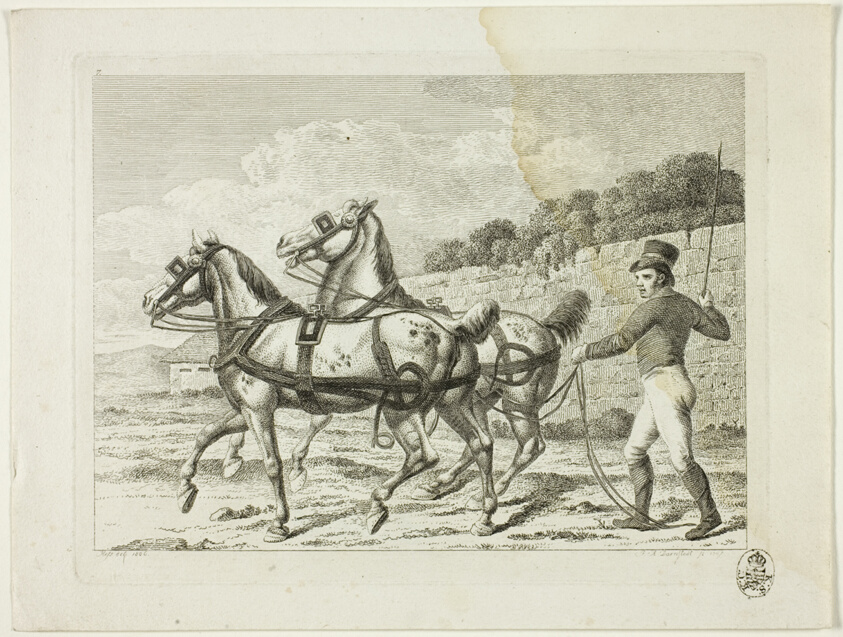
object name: Print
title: Riding School and Horses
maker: Johann Adolph Darnstedt (German, 1769-1844)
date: 1806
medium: Etching on paper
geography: Germany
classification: etching; prints and drawing; print